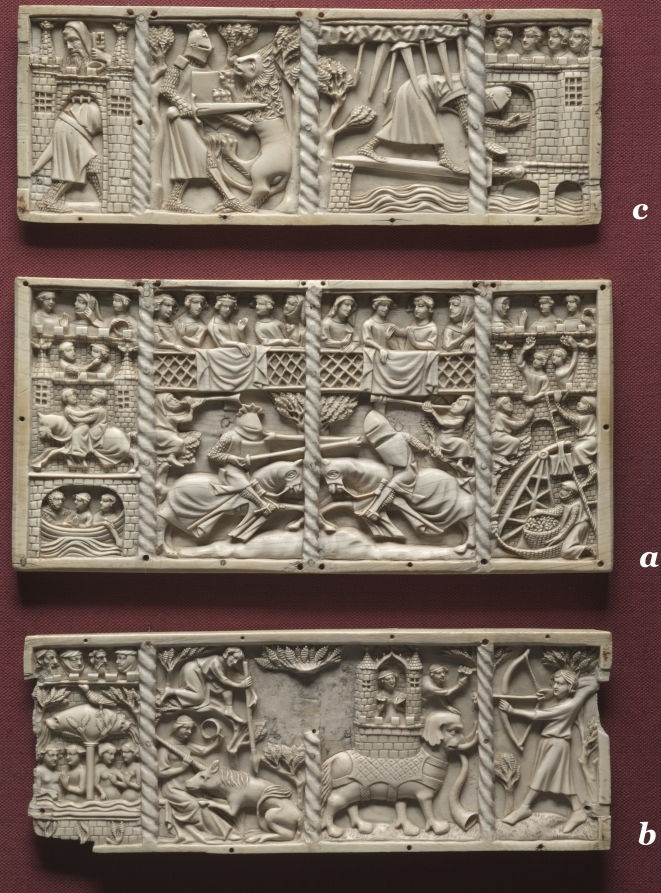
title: Set of Three Panels from a Casket with Scenes from Courtly Romances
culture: France, Lorraine?, Gothic period, 14th century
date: c. 1330–50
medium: ivory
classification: Ivory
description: Among the most lavish and deluxe products of French ivory workshops of the 1300s were large caskets carved with elaborate scenes drawn from courtly romances. The panels shown here come from such a casket. The largest panel (center) once formed the lid and depicts a tournament, the most splendid and romantic of knightly activities. Just to the right is a favorite allegory of chivalric love: knights assaulting the castle of love. The two side panels depict other scenes such as the fountain of youth, Sir Gawain and the Lion, and Lancelot crossing the sword bridge. These images suggesting chivalry, fertility, virginity, youth, and an idealized courtly love likely derive from manuscripts including the Roman de la Rose and the poems of Chrétien de Troyes. Such texts were often found within the libraries of the aristocracy, so the casket’s symbolic images would have been readily understood. Such caskets may have originally been gifts between a man and a woman. The expense of the material, ivory, suggests they were produced for an elite, aristocratic clientele.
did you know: In the center panel two knights in mail surcoats and helms joust here with blunted lances "for courtesy," a version of the joust known as the Joust of Peace.